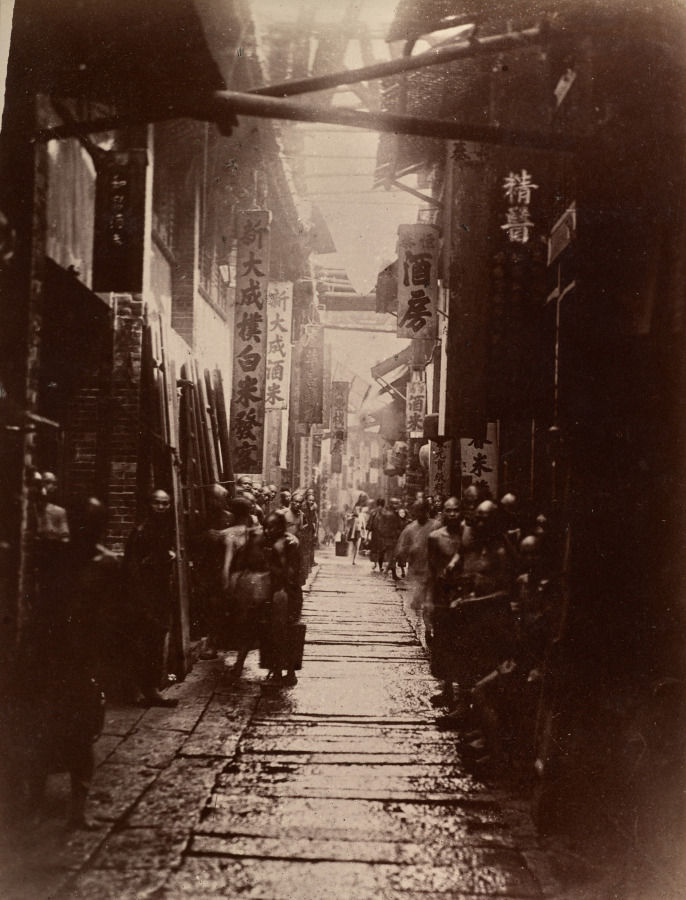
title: Commercial Street, Canton (recto)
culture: China, 19th century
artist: Lai Fong (Afong Studio) (Chinese, c. 1839–1890)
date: c. 1860s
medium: albumen print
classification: Photograph